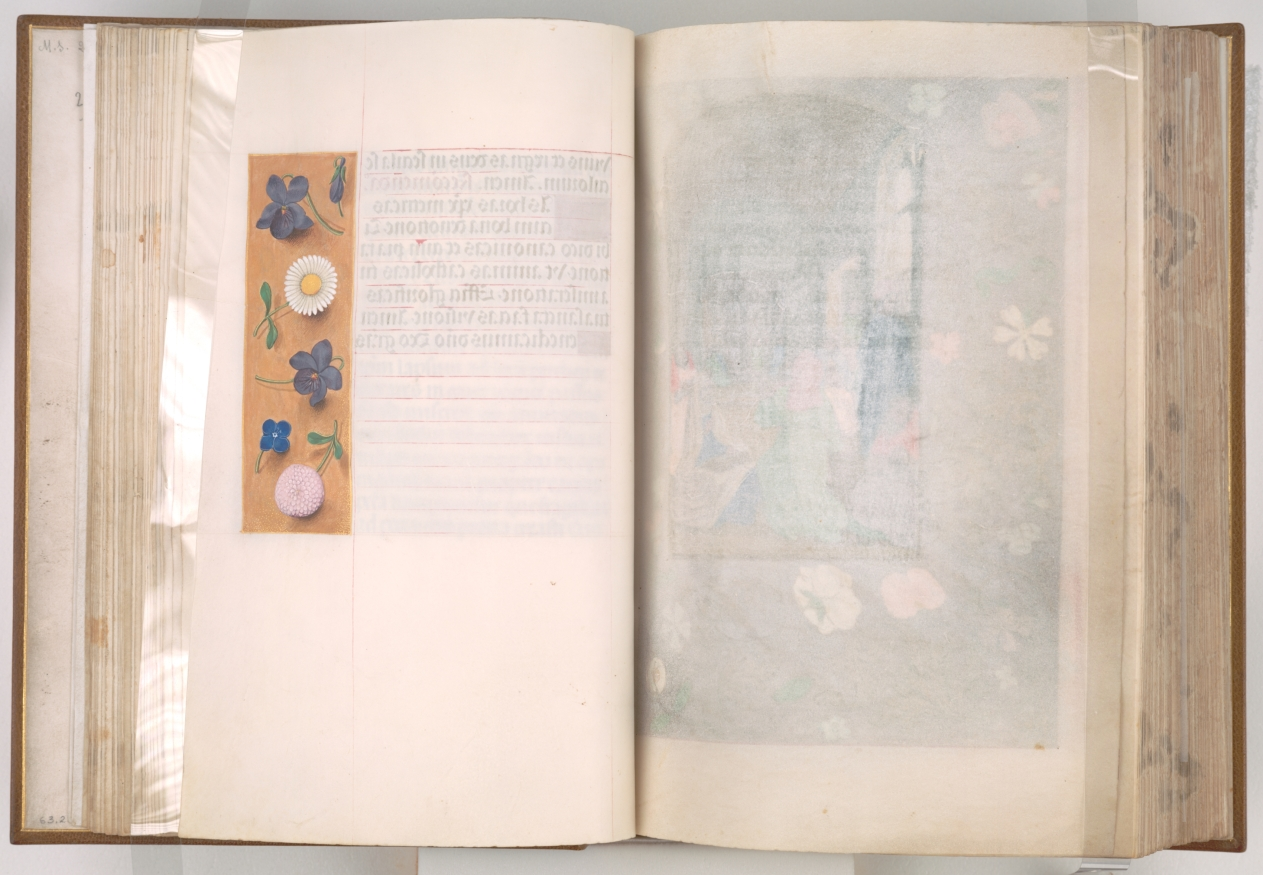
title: Hours of Queen Isabella the Catholic, Queen of Spain: Fol. 30v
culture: Flanders, Ghent and Bruges, late 15th century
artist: Master of the First Prayerbook of Maximillian (Flemish, c. 1444–1519)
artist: and Associates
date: c. 1500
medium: ink, tempera, and gold on vellum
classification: Bound Volume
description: A great lover of Flemish art, Queen Isabella treasured her many devotional books. This deluxe manuscript was created for her private devotions by highly organized and distinctly talented manuscript painters active in Ghent and Bruges. The Ghent-Bruges school represents the culmination of Flemish book painting, whose main features were the use of rich colors, illusionistic effects, a love of landscape, and a strong sense of visual narrative. Manuscripts produced by this circle of artists are renowned for their border decoration featuring a rich variety of realistically painted flowers, scrolling acanthus leaves, birds, and butterflies.